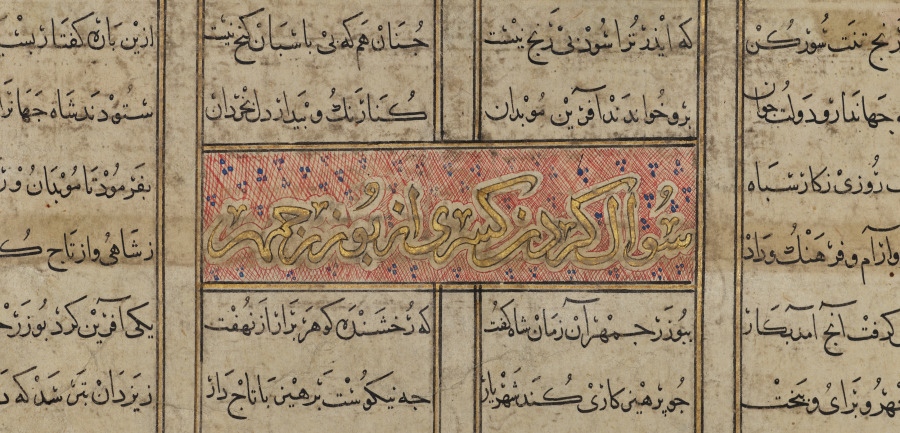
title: Persian Verses: The Fortieth Year of King Kisra Nushirwan's Reign and the Story of Buzurgmihr (recto) from a Shahnama (Book of Kings) of Firdausi (940–1019 or 1025)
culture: Iran, Tabriz, Ilkhanid period (1256-1353)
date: 1330–35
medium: Ink and opaque watercolor on paper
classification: Manuscript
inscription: Script: Naskh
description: Mongol interest in the production of illustrated manuscripts eventually focused on Persian epic poetry. The Shahnama, a compilation of the epics and tales of Iran's legendary heroes, was a natural choice; the book included many subjects that suited Mongol taste, such as banquets, battles, hunting, and magical or fantastic events. The painting on the other side of this page is of the Sasanian ruler of Iran, Khusraw I Anushirwan (531–579), descendant of Bahram Gur. Above the king's head an inscription reads, "Picture of Nushirwan the Just." The figure in the elaborate turban to the left of the king is probably the young Minister Buzurgmihr, famous for his wisdom and virtue. To celebrate the explanation of a troublesome dream by Buzurgmihr, Nushirwan held a series of seven banquets. The text around this painting describes the fifth banquet.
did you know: The Mongol rulers of Iran placed high value on illustrated manuscripts, especially histories, and established royal library-workshops.